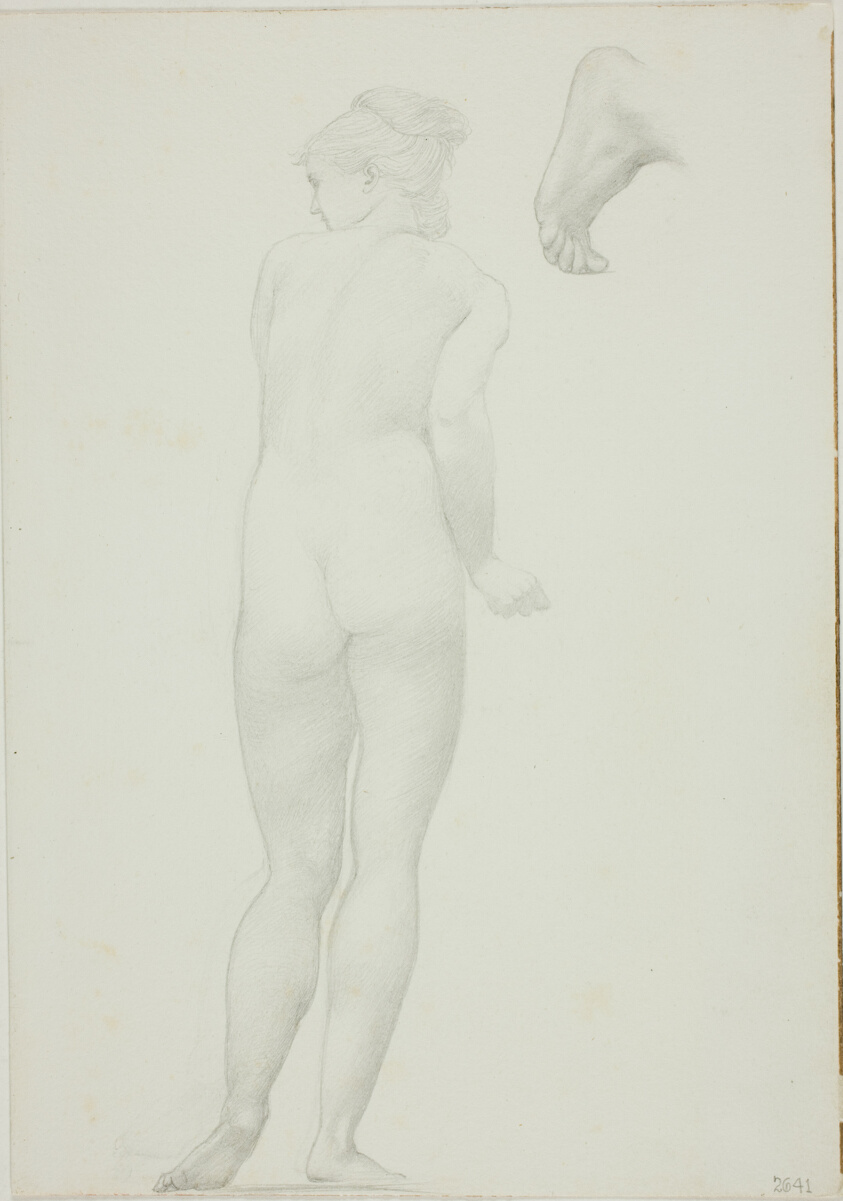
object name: Drawing and Watercolor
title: Backview of Standing Nude Woman and Sketch of a Foot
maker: Sir Edward Burne-Jones (English, 1833-1898)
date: c. 1873–77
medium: Graphite on ivory wove paper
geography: England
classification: graphite; drawings (visual works); prints and drawing